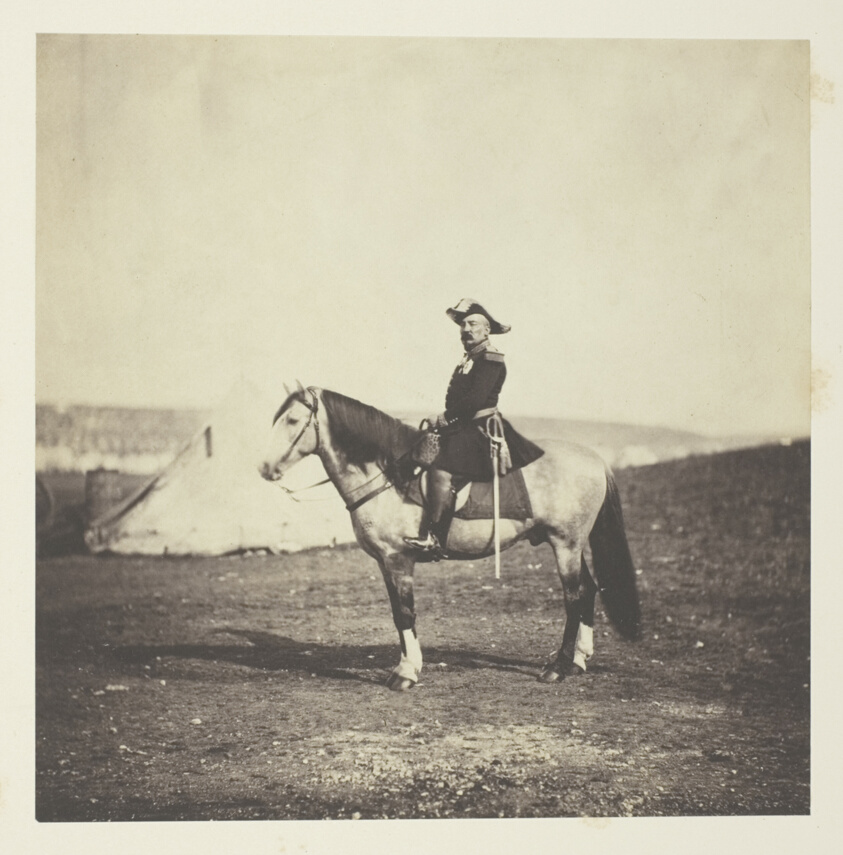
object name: Photograph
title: General Bosquet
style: 19th century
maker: Roger Fenton (English, 1819–1869)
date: 1855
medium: Salted paper print, plate 43 from the album "Photographs Taken in the Crimea" (1856)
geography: England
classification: salted paper print; photographic process; photography; photograph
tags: Collected by Hugh Edwards, Crimea 1856